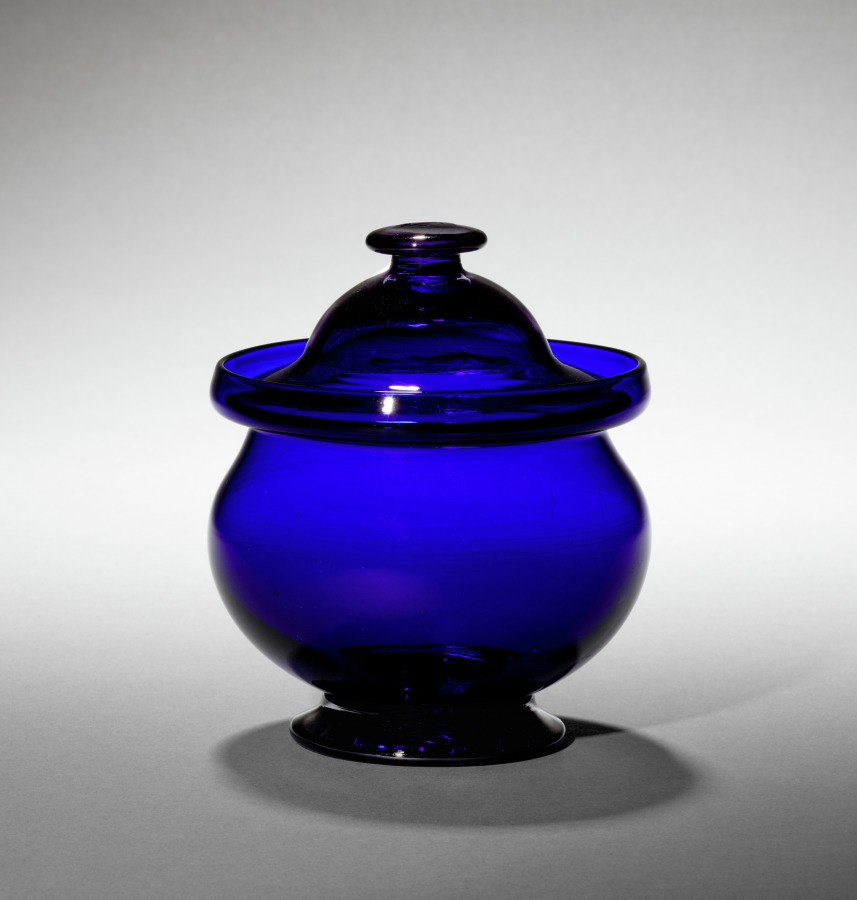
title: Sugar Bowl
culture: America, South Jersey Type, 19th century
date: c. 1840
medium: glass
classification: Glass